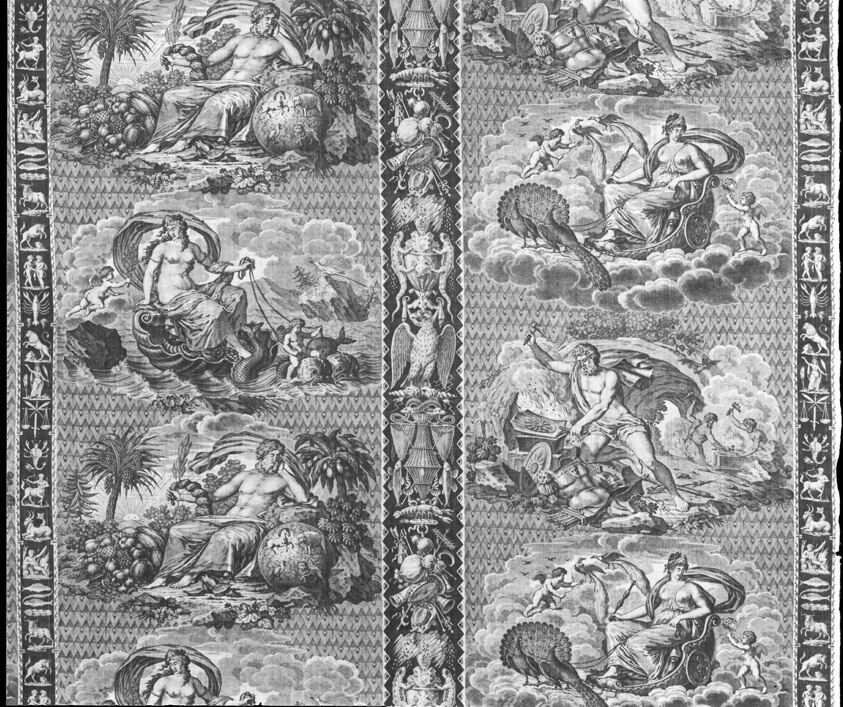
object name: Textile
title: The Elements (Furnishing Fabric)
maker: Designed by Marie Bonaventure Lebert (French, 1759–1836); Manufactured by Hartmann et Fils (French, founded 1776); France, Munster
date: c. 1810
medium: Cotton, plain weave; engraved roller printed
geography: Munster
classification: textile; weaving - printed; weaving; furnishing textile